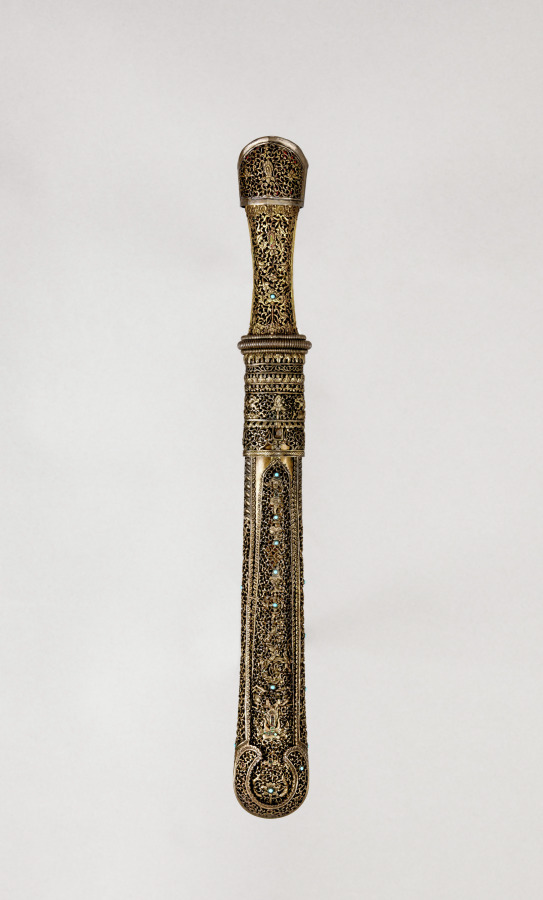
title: Dagger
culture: Northeast India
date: c. 1750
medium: brass with gilt grip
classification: Arms and Armor